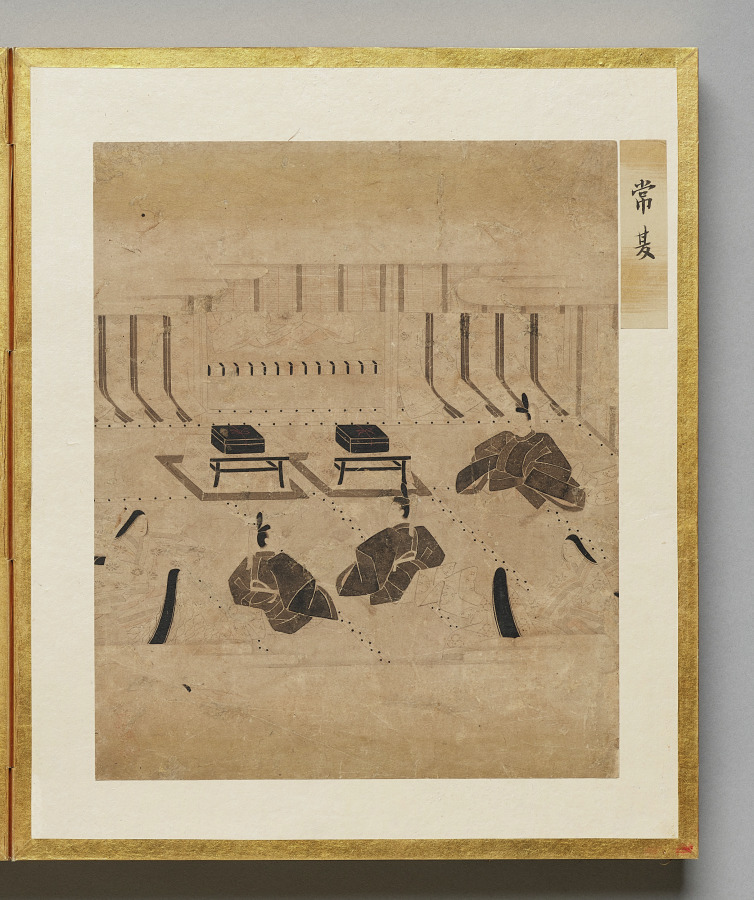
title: Wild Carnation from Album of Illustrations for the Tale of Genji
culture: Japan, Edo period (1615–1868)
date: 1600s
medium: painting in an accordion-style album; ink, light color, and gold on paper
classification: Bound Volume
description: This album contains illustrations for the classic literary work the Tale of Genji, authored in the 1000s by Murasaki Shikibu, an aristocrat of the Heian period (794–1185) court. The scenes are painted in the “white drawing” (hakubyō) mode, in which a fine ink line is used to depict figures and spaces with great subtlety, punctuated only occasionally by traces of red pigment for a character’s lips, a detail of a garment, or a decorative element. These two scenes illustrate episodes from the chapters “Thin Veil of Cloud” (Usugumo) and “Barrier Gate” (Sekiya).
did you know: The illustrations are identified by chapter title in cartouches to the upper right of the paintings.